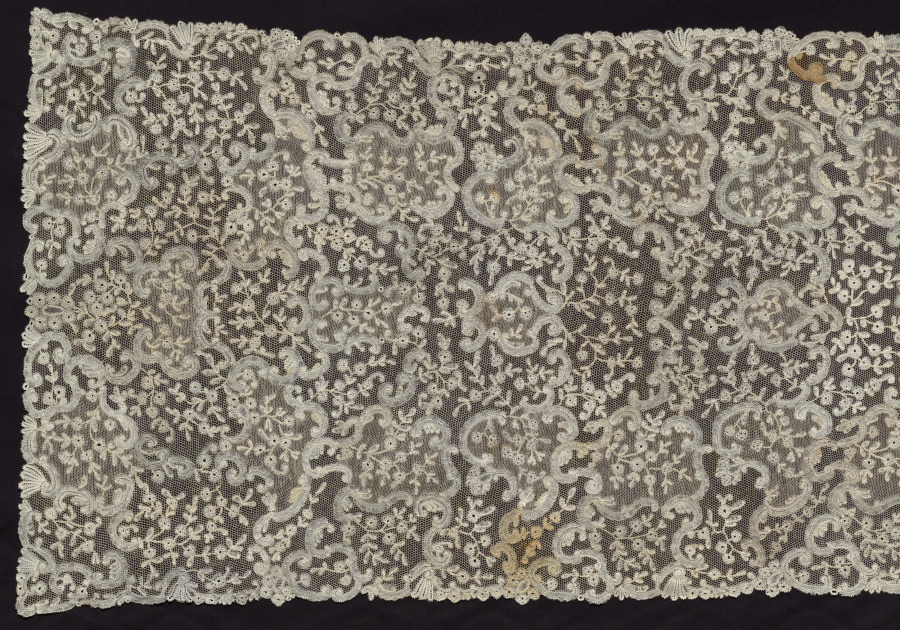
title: Lace Panel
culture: Probably Belgium, Brussels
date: 1800s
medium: linen: Duchesse(?) bobbin lace with plaited ground joining motifs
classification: Lace